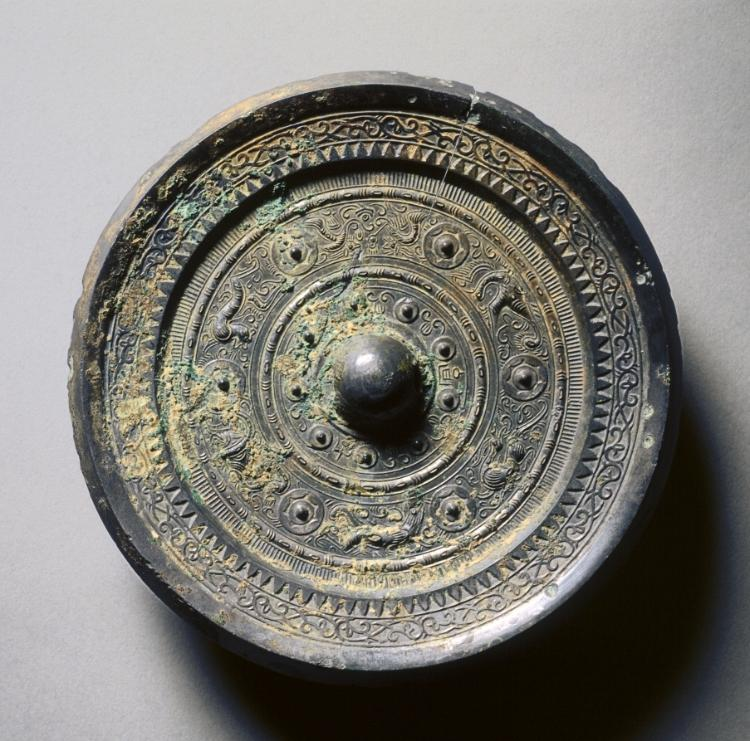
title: Mirror with Concentric Circles, an Immortal, and Auspicious Animals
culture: China, Eastern Han dynasty (25–220 CE)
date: 25–100 CE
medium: bronze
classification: Metalwork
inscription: May your sons [and grandsons] cherish it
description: Mirror with Concentric Circles, an Immortal, and Auspicious Animals, 1st century ad China, Eastern Han dynasty (ad 25-220) CMA 1995.304 [Cat. no. 23]